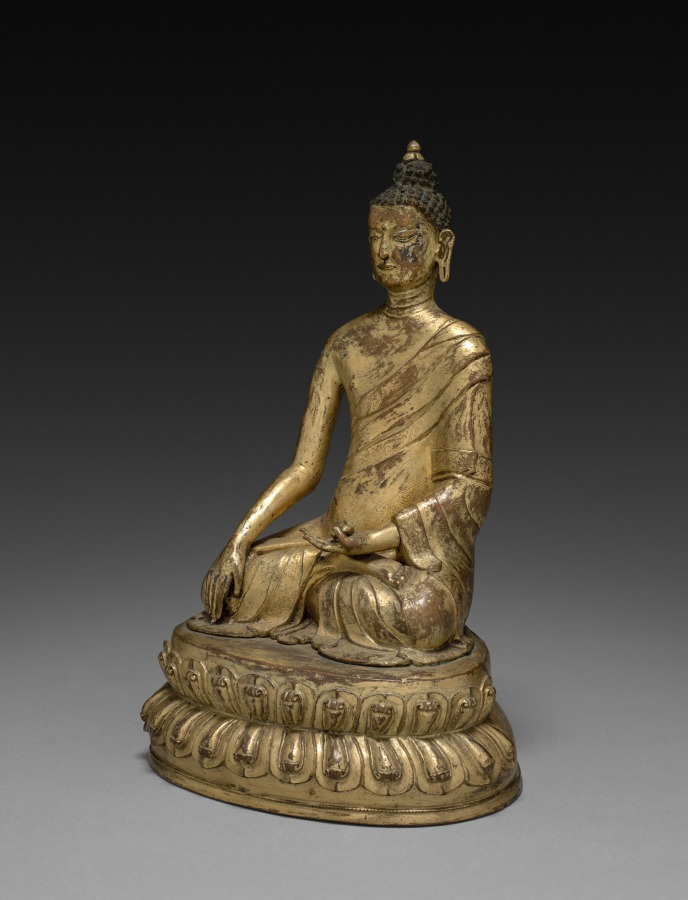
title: Buddhist Triumphant over Temptation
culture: China, Yuan dynasty (1271-1368)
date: c. 1300–1320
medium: gilt bronze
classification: Sculpture